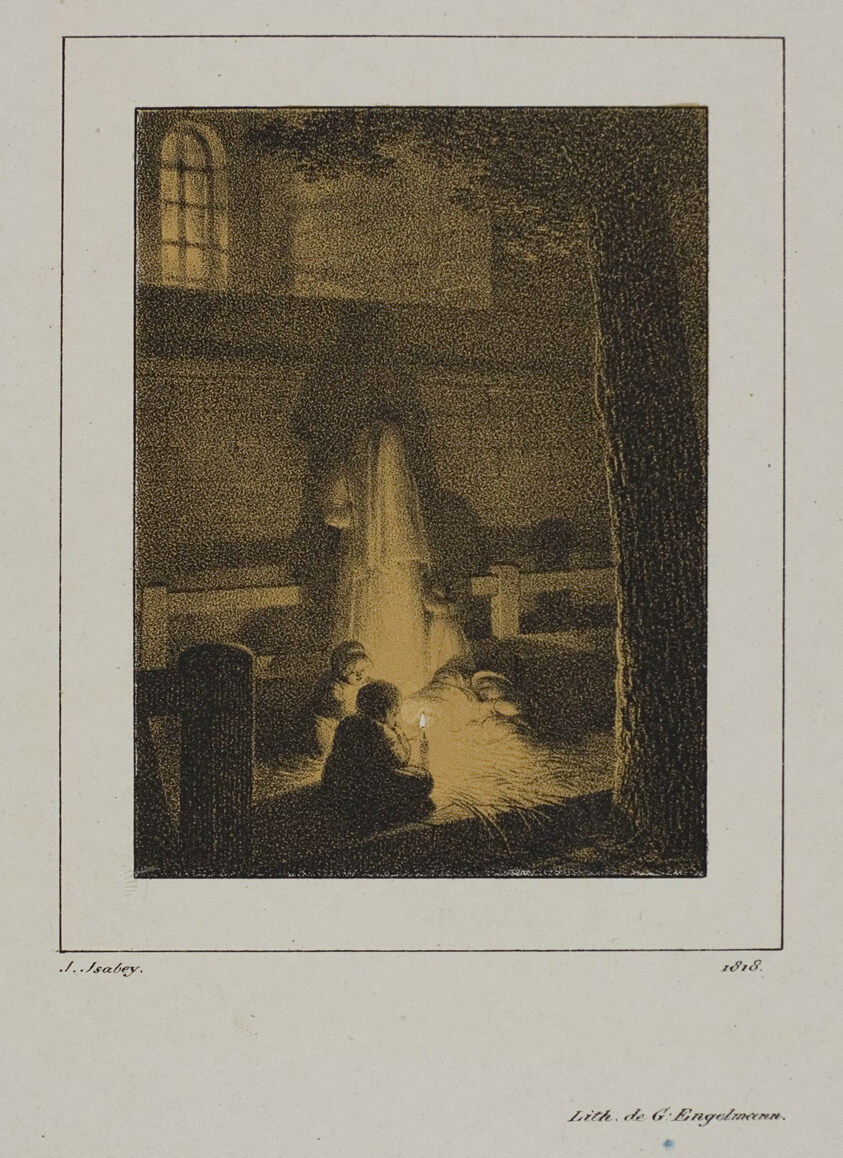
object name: Print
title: Group of Children Around a Candle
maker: Jean Baptiste Isabey (French, 1767-1855); printed by Gottfried Engelmann (French, 1788-1839)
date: 1818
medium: Lithograph in black with second tint stone in orange on ivory wove paper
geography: France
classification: lithograph; print; prints and drawing